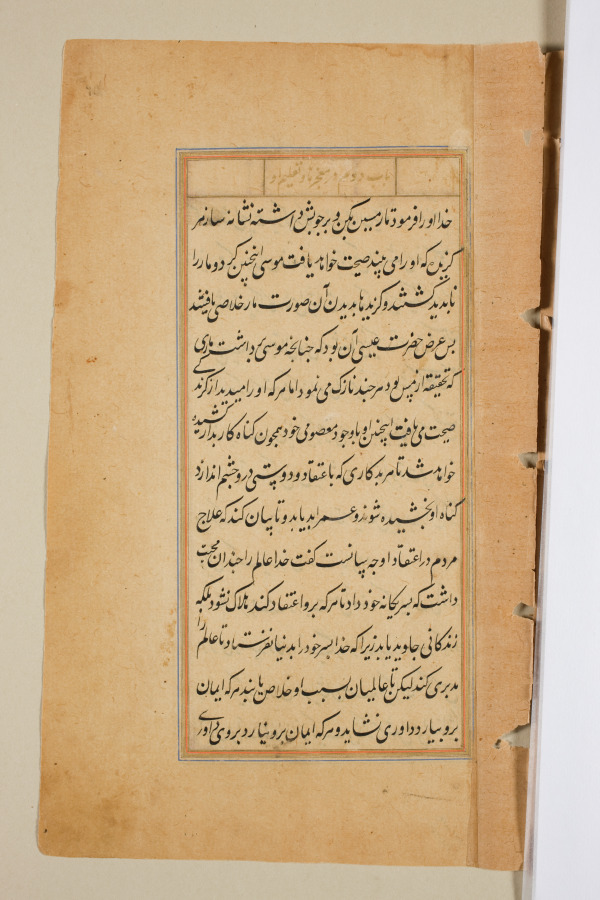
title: Text page from a Mirror of Holiness (Mir’at al-quds) of Father Jerome Xavier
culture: Mughal India, Allahabad, made for Prince Salim (1569–1627)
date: 1602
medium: Ink and gold on paper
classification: Manuscript